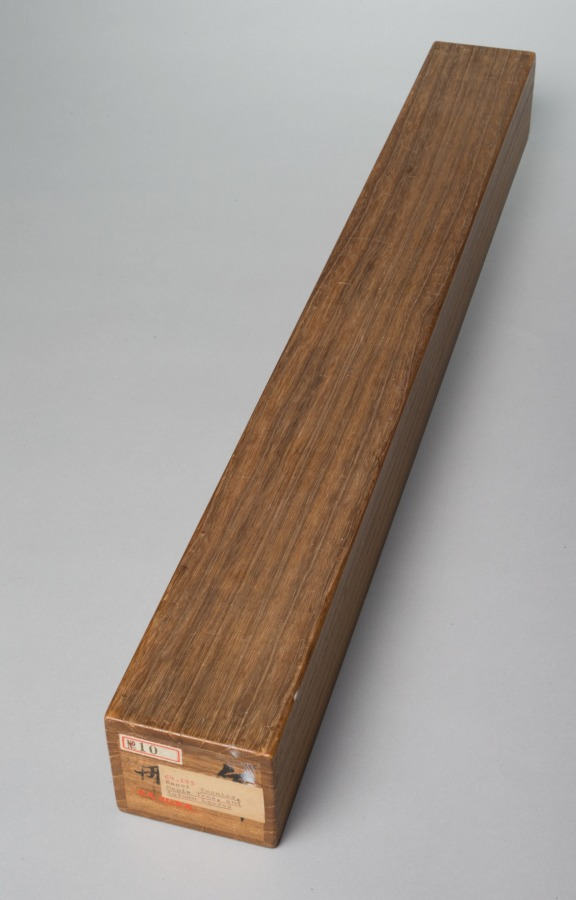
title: Peonies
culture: Japan, Edo period (1615–1868)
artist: Tatebayashi Kagei (Japanese, active mid-1700s)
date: mid 1700s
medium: hanging scroll; ink and color on paper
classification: Painting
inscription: lower right, Kagei's signature in black, a round red seal and a small square one.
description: A proliferation of white tree peonies dominates this composition. Behind them are tall, feathery-topped susuki grasses and leafy deciduous trees. Tatebayashi Kagei restricted his palette to ink with red and white color, along with sparing use of green in the peony leaves and the blades of grass. He made generous use of the “dripping-in” (tarashikomi) technique, layering pooled ink and color, in the peony leaves. The areas left in reserve create the impression of insect-eaten or late season foliage.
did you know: In 1738, Kagei received a copy made by Ogata Kōrin of a fan painting by Tawaraya Sōtatsu from Kōrin's brother Ogata Kenzan, so some think he trained with Kenzan in Edo (present-day Tokyo).